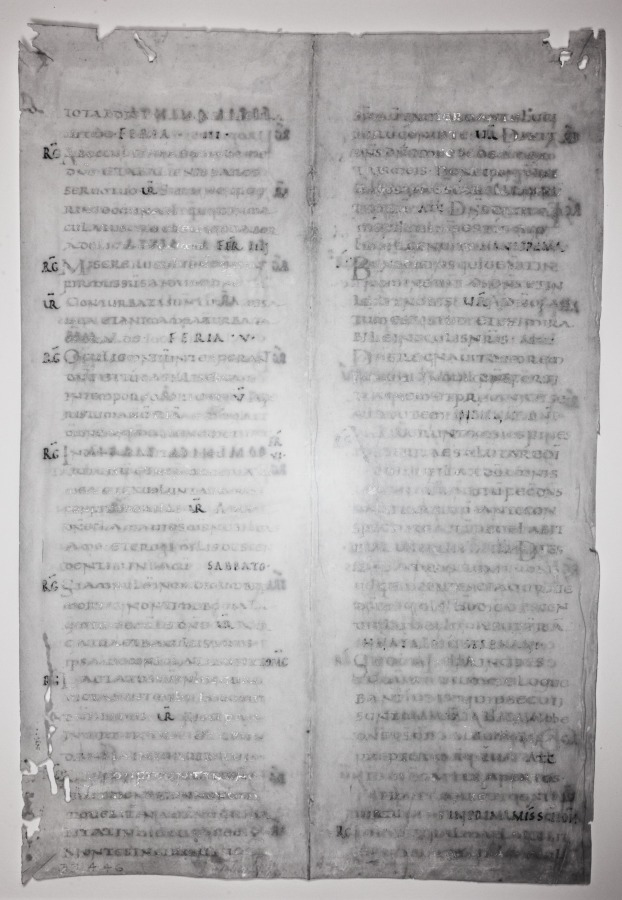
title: Bifolium Excised from a Carolingian Gradual (verso)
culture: Germany or Northeastern France, 9th century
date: c. 830–860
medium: gold and silver ink on purple parchment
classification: Manuscript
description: This rare leaf comes from a cantatorium or gradual, a book containing the chants to be sung during the Mass. Other leaves from the same book survive in Berlin and Trier. A bifolium, or double-leaf, it does not contain decorated letters but rather "emphasized" letters. These were enlarged and pushed out into the margins to call attention to the eye. Such emphasized letters originated in late classical times and were the precursor to the decorated initial developed by medieval scribes. The purple-stained vellum (now faded to a deep pink) with its text written in gold and silver inks (now turned black) suggested great luxury with its sumptuous appearance. In Mediterranean regions, the purple dye was obtained from murex, a shell-fish dye. In northern Europe, plant dyes were used as an alternative. Combined with the use of gold and silver ink (now turned black) a spectacular appearance was achieved that is traceable back to classical antiquity.